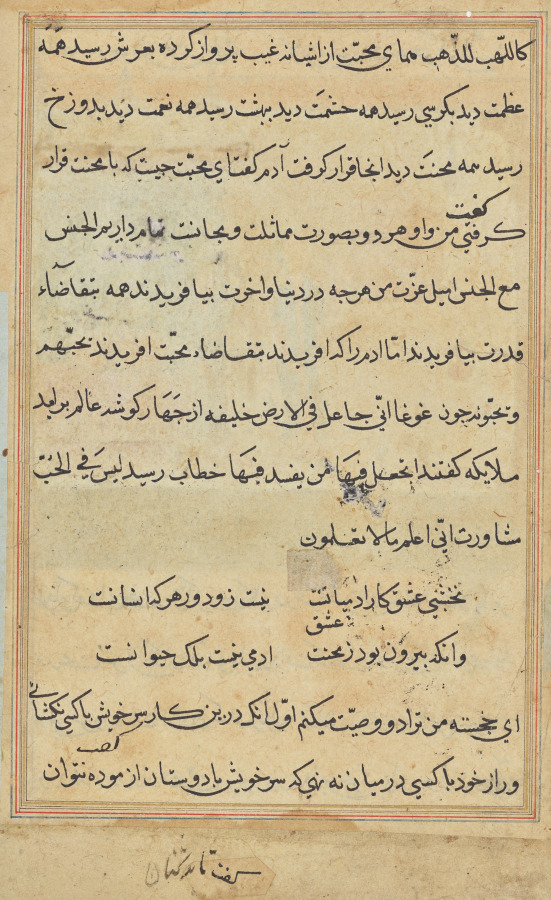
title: Page from Tales of a Parrot (Tuti-nama): text page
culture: Mughal India, court of Akbar (reigned 1556–1605)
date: c. 1560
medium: gum tempera, ink, and gold on paper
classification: Painting